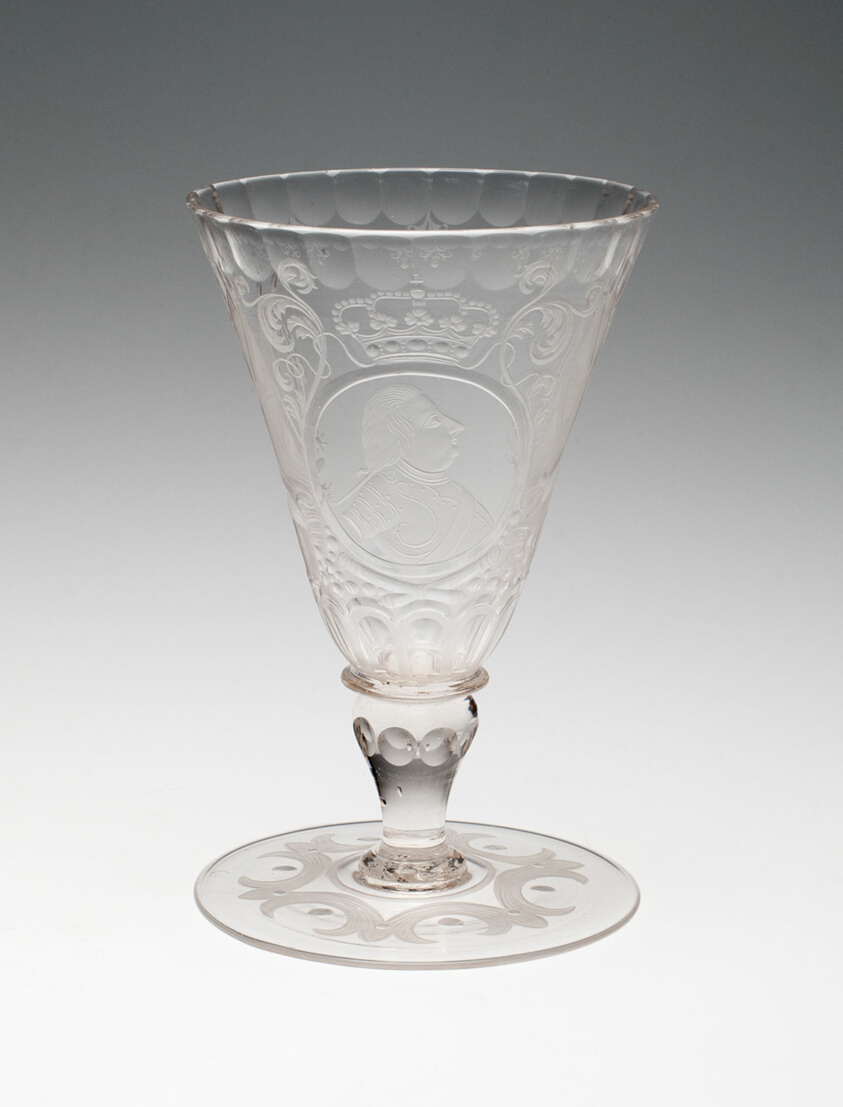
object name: Glass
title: Goblet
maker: Germany, Potsdam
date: c. 1720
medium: Glass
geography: Potsdam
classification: drinking vessel; glass; european decorative arts